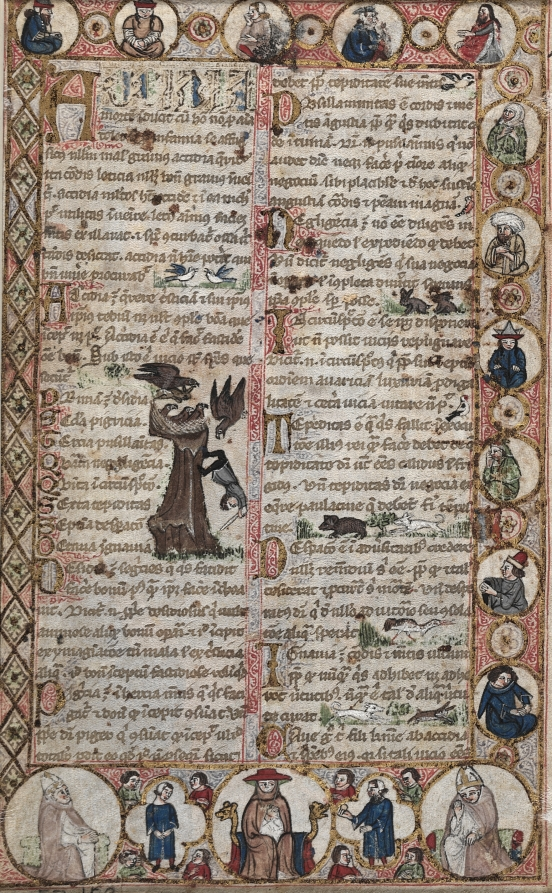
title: Leaf from a Cocharelli Treatise on the Vices: Acedia and Her Court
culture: Italy, Genoa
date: c. 1330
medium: ink, tempera, and gold on vellum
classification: Manuscript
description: This leaf comes from a treatise written before 1324 by a member of the Genoese Cocharelli family as a moral lesson for the following generation. The family’s dedication to education is seen in the use of Latin and the theme of the seven capital vices. We see Queen Accidia (or Sloth) lying in bed, bored despite all the distractions around her. The depiction of the precious fabrics shows an intimate knowledge of textiles from the Islamic world and is a testament to the flourishing trade contacts of Genoa.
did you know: This miniature is noteworthy for its depiction of richly adorned textiles and jeweled headdresses imitative of the Islamic world.